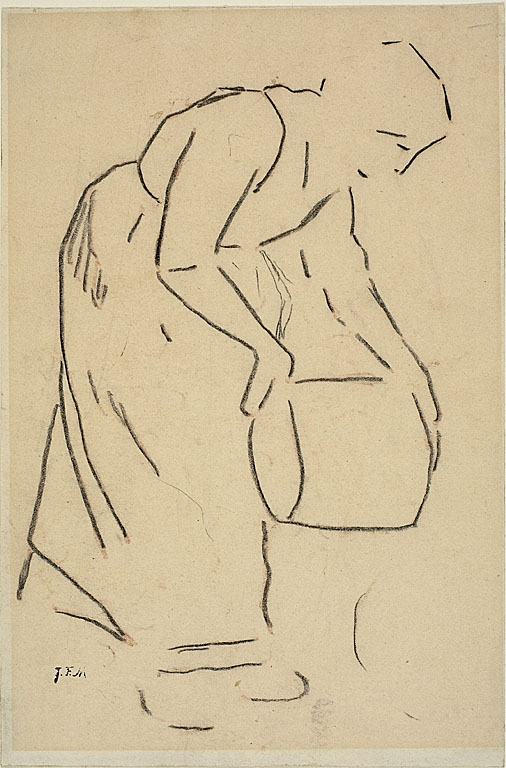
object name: Drawing and Watercolor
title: Woman Emptying a Pail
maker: Jean François Millet (French, 1814-1875)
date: 1856/1857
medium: Black crayon, over red chalk, on ivory wove paper (discolored to tan)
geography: France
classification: crayon; drawings (visual works); prints and drawing